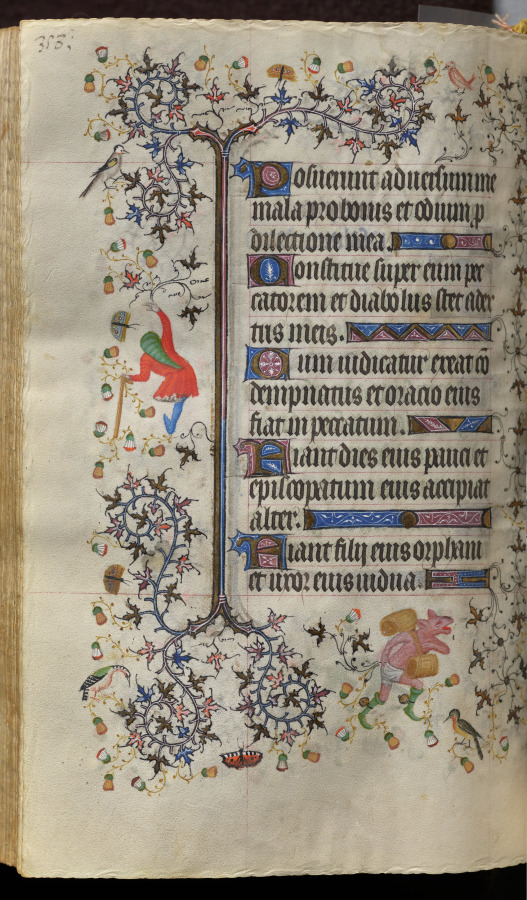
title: Hours of Charles the Noble, King of Navarre (1361-1425): fol. 174v, Text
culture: France, Paris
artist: Master of the Brussels Initials and Associates (French)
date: c. 1405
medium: ink, tempera, and gold on vellum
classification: Bound Volume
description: This precious volume was obviously highly prized by its owner, the French-born King of Navarre, who had his coat of arms painted on no less than twenty folios. Rather than directly commissioning this manuscript from a specific workshop, it seems that Charles the Noble acquired his book of hours -- perhaps ready-made for the luxury market -- while on a trip to Paris in 1404-05. A collaborative effort, six painting styles are evidenced within the pages of this codex, those of two Italians, two Frenchmen, and two Netherlanders. The painter who was responsible for the planning and decoration of the book, and who produced seventeen of the large miniatures, was a Bolognese artist known as the Master of the Brussels Initials. His principal assistant, responsible for most of the borders, was a Florentine who signed his name "Zecho" da Firenze on folio 208 verso.